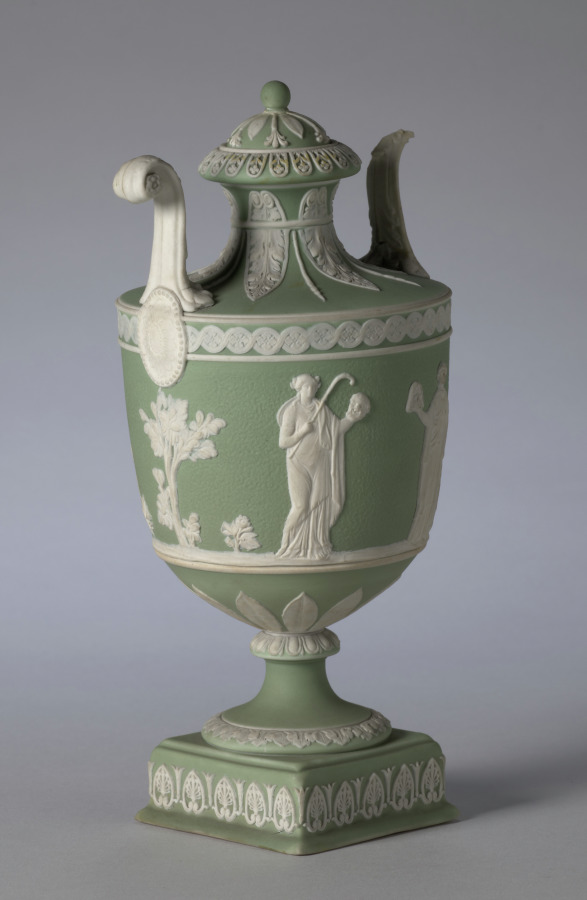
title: Covered Urn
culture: England, Staffordshire, late 18th-early 19th Century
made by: Wedgwood Factory (British)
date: c. 1800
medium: jasper ware with relief decoration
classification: Ceramic